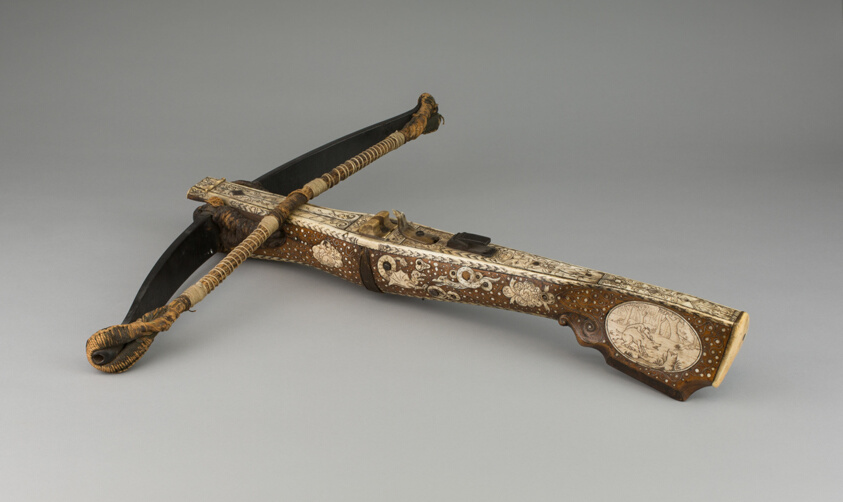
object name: Arms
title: Sporting Crossbow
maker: German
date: 1600/25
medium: Wood, steel, horn, bone, and cord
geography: Germany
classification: crossbow; arms; arms and armor